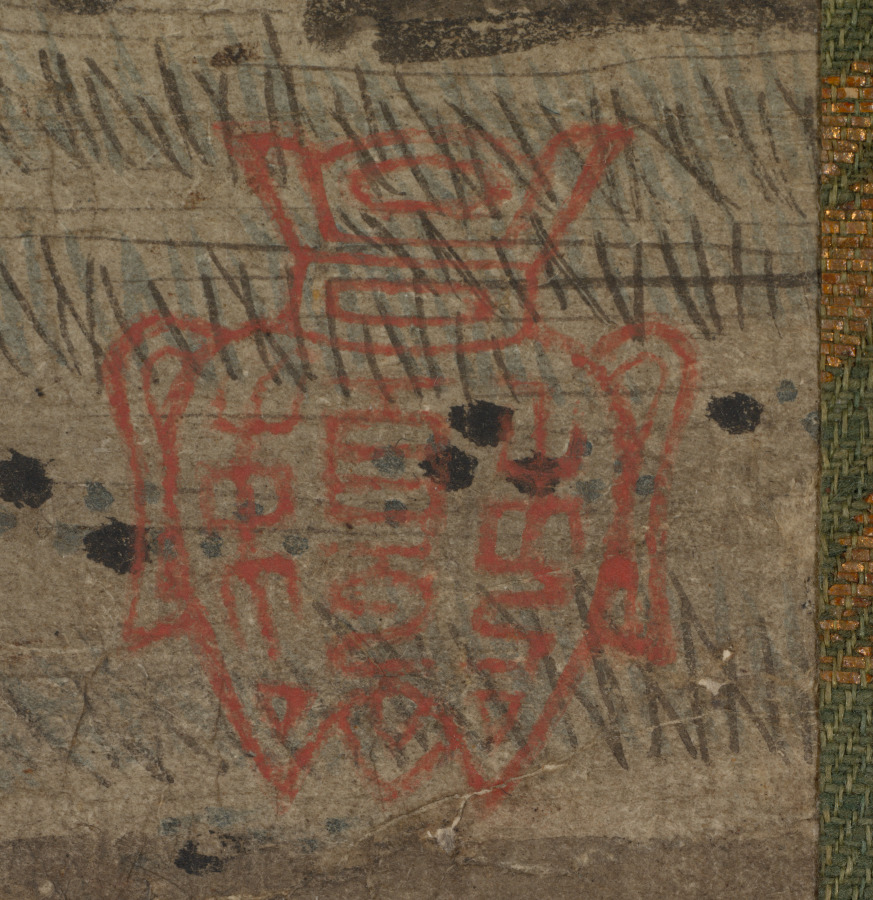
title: Farming and Herding Buffalo in Summer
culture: Japan, Muromachi period (1392–1573) to Momoyama period (1573–1615)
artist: Kano Hideyori (Japanese, active mid- to late 1500s)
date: mid- to late 1500s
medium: hanging scroll; ink and light color on paper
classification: Painting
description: Hideyori is most famous as the painter of a very early pair of genre screen paintings depicting people enjoying autumn foliage at a shrine-temple complex in Mount Takao near Kyoto. In this scene, people are hard at work farming their fields and herding water buffalo in summer. Such scenes were often associated with promoting the ideal of a prosperous realm, and also with the activities of the 12 months. Historical sources are divided on the biography of painter Kano Hideyori, but many scholars now believe he was the second son of Kano Motonobu, head of the Kyoto-based Kano family atelier.